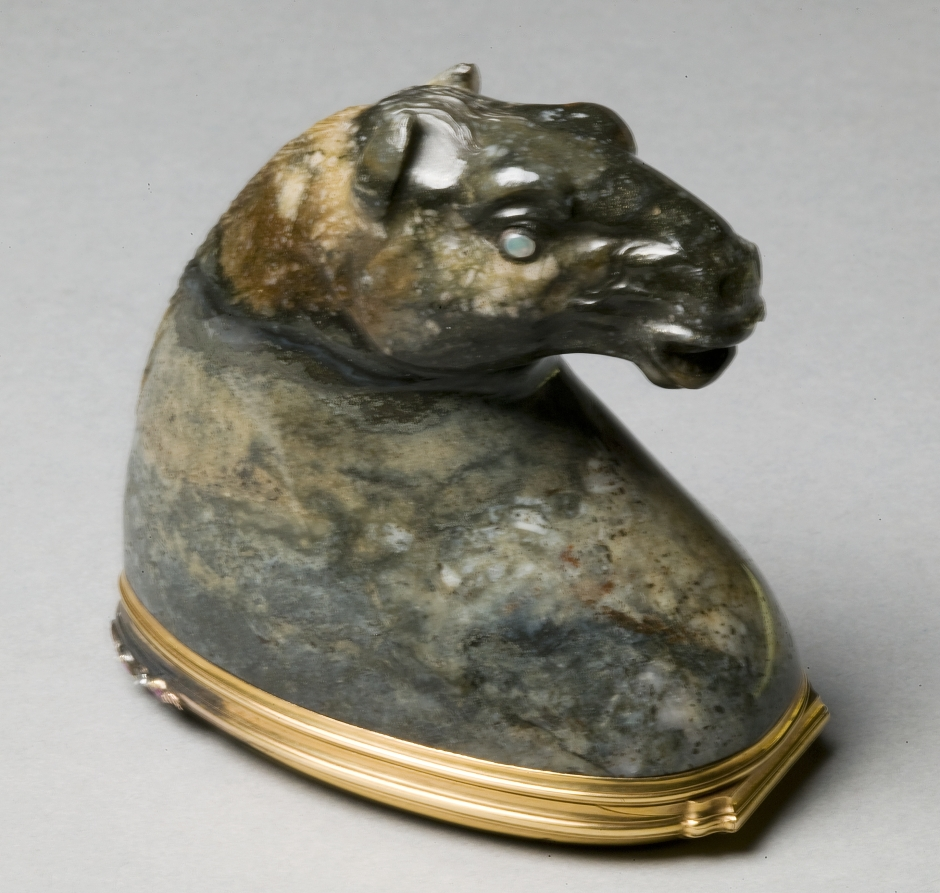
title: Snuff Box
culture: Germany, 18th century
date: c. 1750–60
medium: agate, gold, opal, rubies, diamonds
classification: Miscellaneous